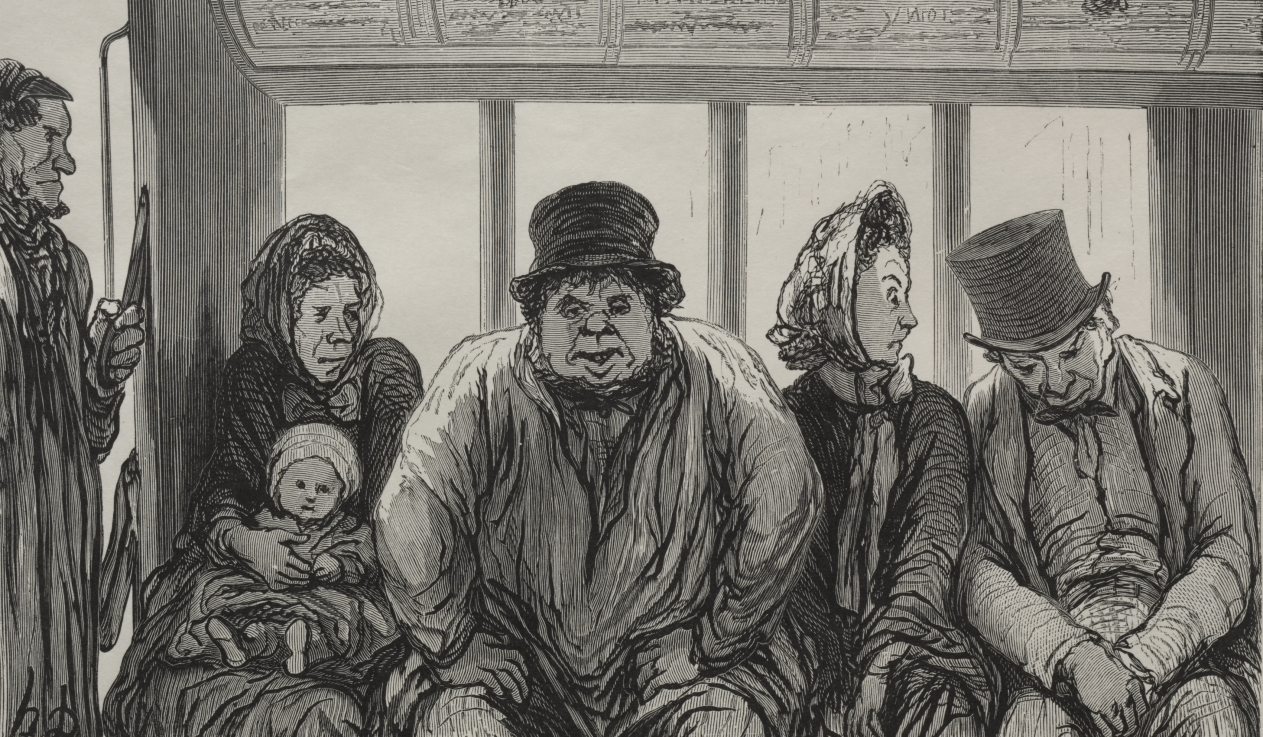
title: Interior of an Omnibus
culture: France, 19th century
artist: Honoré Daumier (French, 1808–1879)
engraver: Charles Maurand (French, 1824–1904)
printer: François Louis Schmied (Swiss, 1873–1941)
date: 1864, printed 1920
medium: wood engraving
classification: Print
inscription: Lower margin, in pencil: 68/75 ; red stamp: FLS